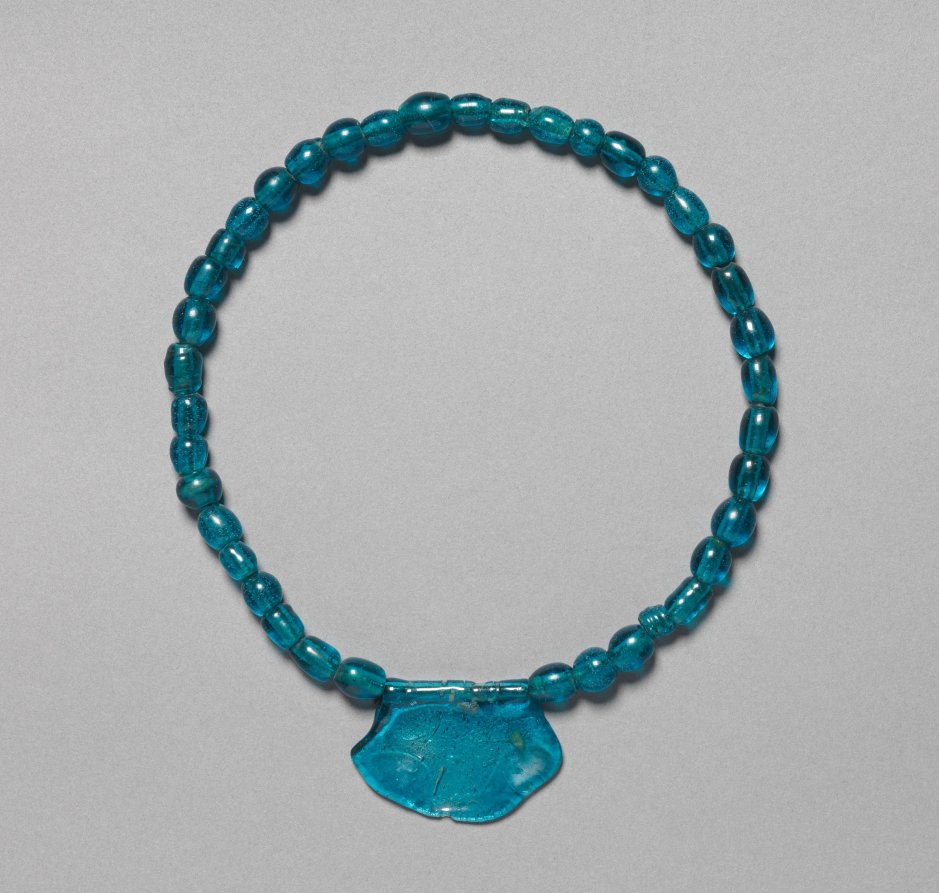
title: Glass Beads with Pendant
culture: Korea, Three Kingdoms period (57 BCE–668 CE)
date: 57 BCE–668 CE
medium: glass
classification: Jewelry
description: An enormous amount of beaded strings and necklaces were excavated from Silla tomb sites. Glass, largely produced in ancient Rome since the late 1st century, also reached the Korean peninsula through the Silk Road, the ancient global trade route. Yet the blue glass beads shown in this necklace are highly likely to be soda glass produced in the Silla territory.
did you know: Glass, largely produced in ancient Rome since the late 1st century, also reached the Korean peninsula through the Silk Road, the ancient global trade route.